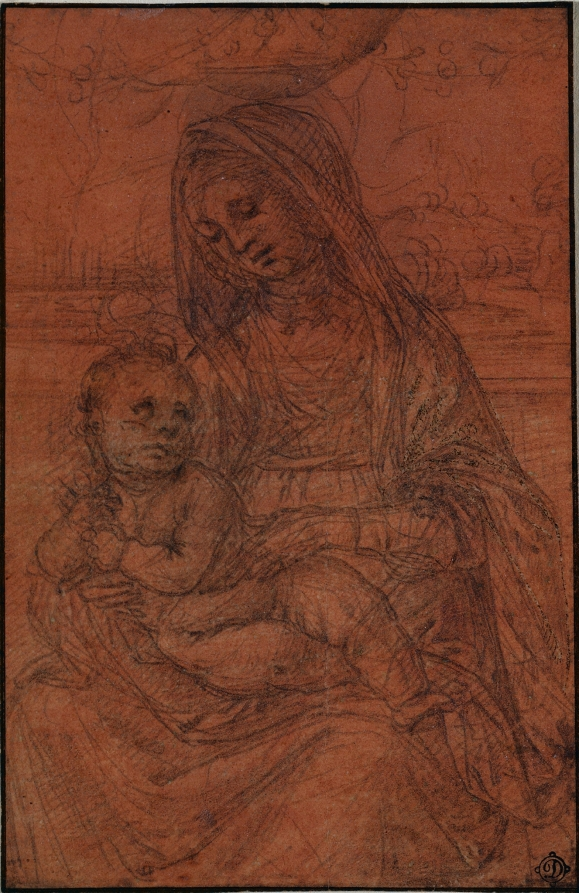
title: The Virgin and Child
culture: Italy, 16th century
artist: Lorenzo di Credi (Italian, 1459–1537)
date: c. 1510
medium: metalpoint, (losses on left sleeve of the Madonna restored in pen and brown ink?); framing lines in black and brown ink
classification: Drawing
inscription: VERSO, lower right, in graphite: Lorenzo di Cre[di, paper skinned] ; VERSO OF SECONDARY SUPPORT (now removed), lower left, in graphite: No. 5 [underlined]